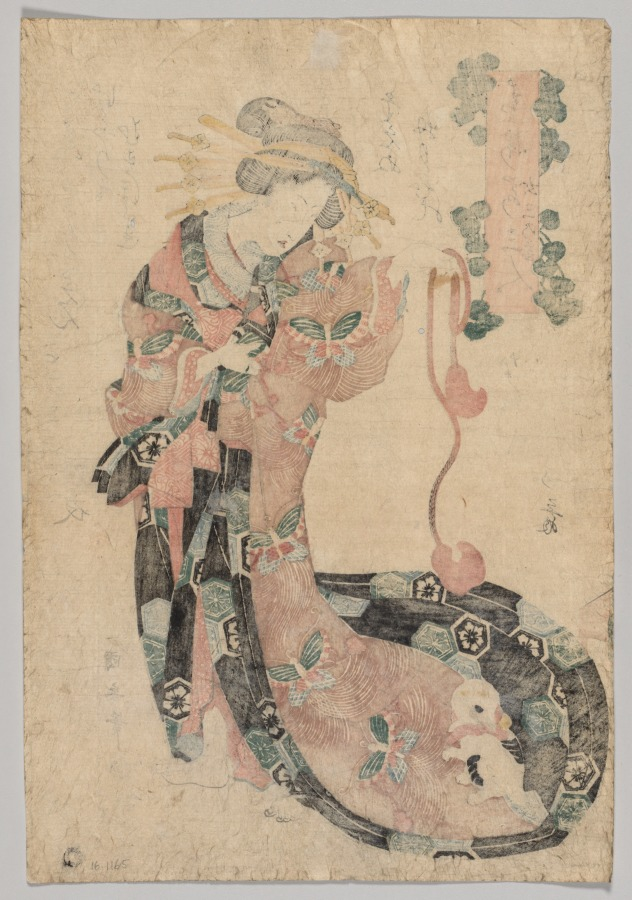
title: Courtesan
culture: Japan, Edo period (1615–1868)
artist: Utagawa Kuniyasu (Japanese, 1794–1834)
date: 1794–1834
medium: color woodblock print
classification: Print